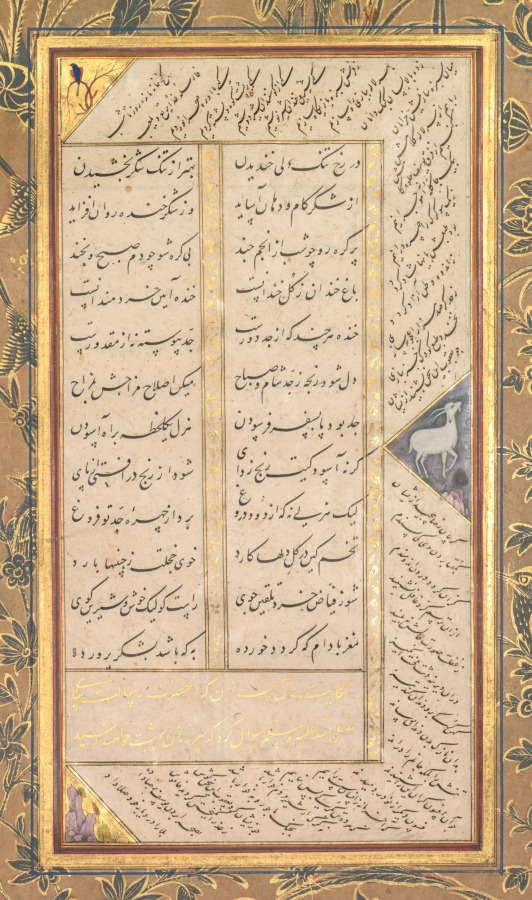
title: Page from a Panj Ganj (Five Treasures) of Abd al-Rahman Jami (Persian, 1414–1492), with two Persian masnavis: Yusuf va Zulaykha (Joseph and Zulaykha) and Subhat al-abrar (Rosary of the Righteous) (verso)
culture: Northern India, Mughal, early 17th century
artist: Mushfiq (Indian, active early 1600s)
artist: and others (Indian)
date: 1520–1607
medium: Gum tempera, ink, and gold on paper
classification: Painting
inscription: The miniature signed at upper left: ' amal - i Mushfiq sana 1015 (the work of the Mushfiq year 1015) Text on verso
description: This page is from a prized manuscript owned by one of the most respected statesmen of the imperial Mughal court, Abd al-Rahim. He served as the Khan Khanan, or vizier, the trusted minister under both Akbar and Jahangir. Abd al-Rahim was an avid book collector and patron of the arts. He acquired this book of five extended narrative poems, which included the story told in rhyme of the romance between Joseph and the Egyptian lady Zulaykha, about 80 years after its completion. The book’s illumination had not been finished, so Abd al-Rahim commissioned the exuberant decor of the borders and insets along with fullpage paintings that illustrate key scenes in the text.